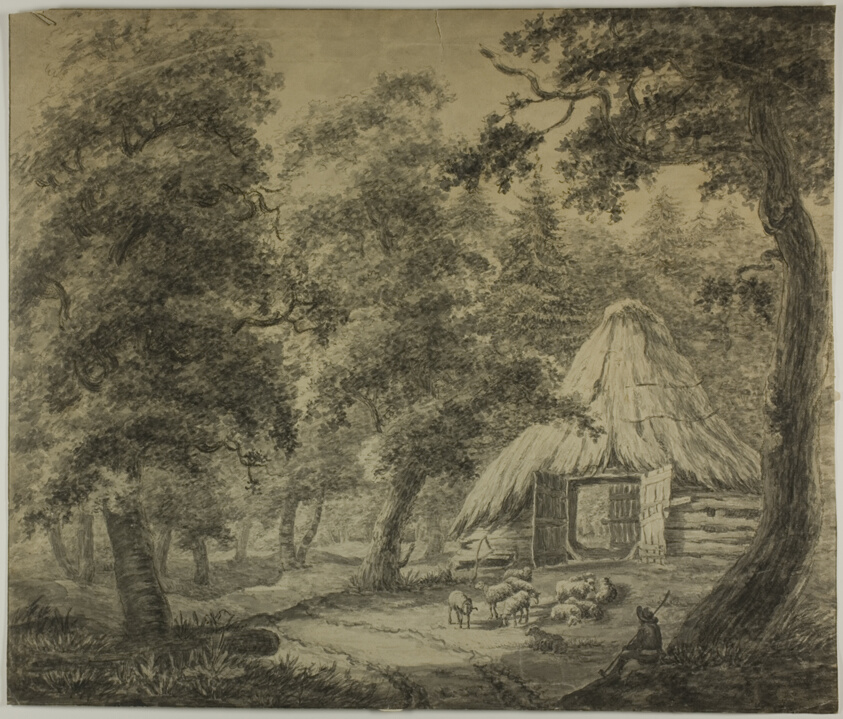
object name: Drawing and Watercolor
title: Thatched Hut in Woods with Shepherd and Sheep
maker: Attributed to Anthonie Waterloo; Dutch, c. 1610-1690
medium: Black chalk and brush and gray wash on cream laid paper, tipped onto cream laid paper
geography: Holland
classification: drawings (visual works); prints and drawing